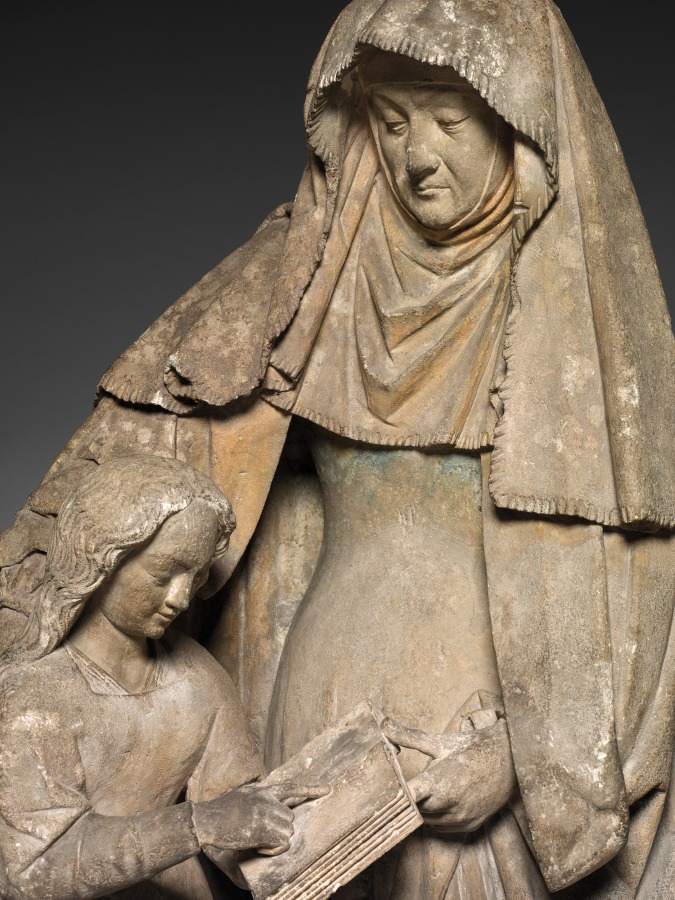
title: Education of the Virgin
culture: France, Bourbonnais, 16th century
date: c. 1500–1510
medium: limestone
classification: Sculpture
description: This relief depicts the young Virgin Mary learning to read at the knee of her mother Anne.